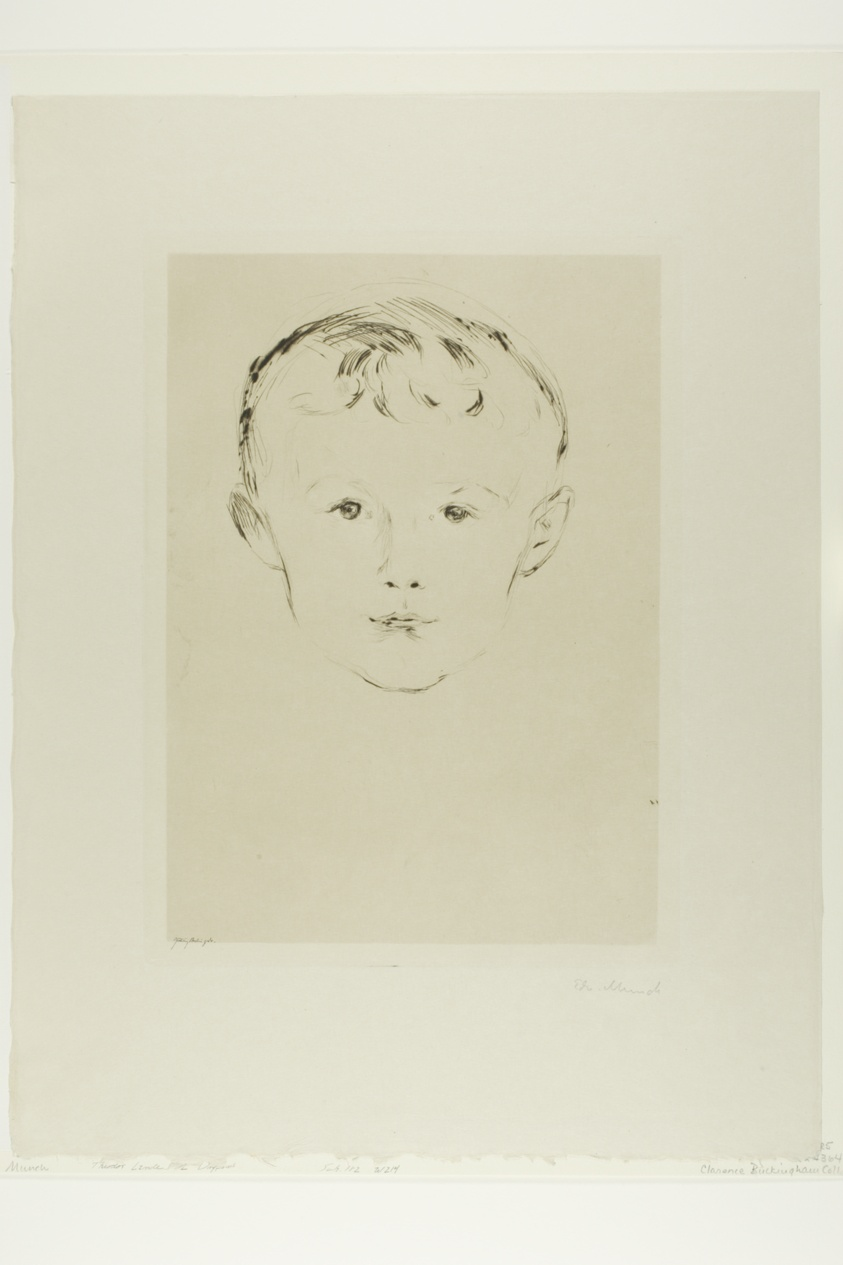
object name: Print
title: Theodor Linde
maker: Edvard Munch (Norwegian, 1863-1944)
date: 1902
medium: Drypoint in brown on cream wove paper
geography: Norway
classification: drypoint; print; prints and drawing